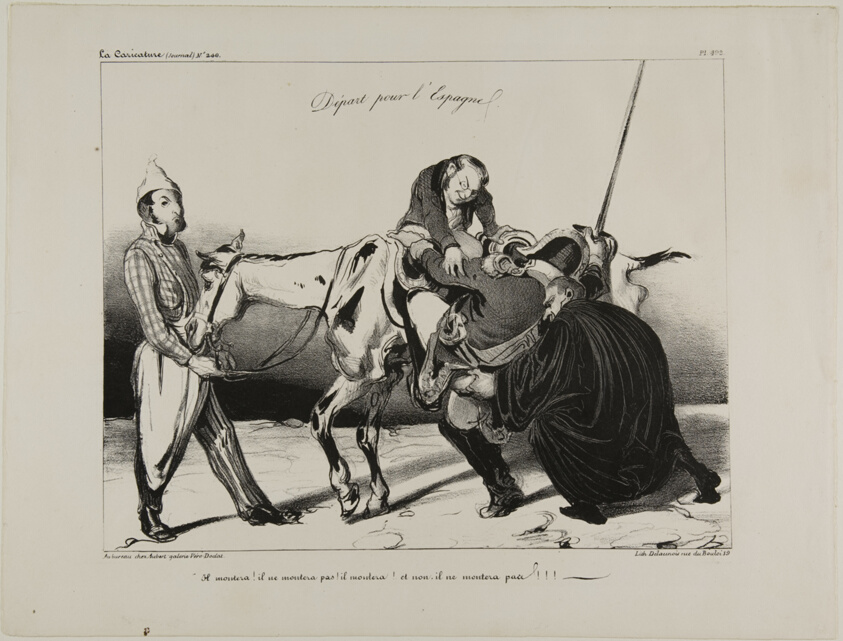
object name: Print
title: Departure for Spain. “He will mount! he will not mount! he will mount! and no, he will not mount!!!,” plate 498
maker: Honoré Victorin Daumier; French, 1808-1879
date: 1835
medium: Lithograph in black on ivory wove paper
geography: France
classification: lithograph; print; prints and drawing